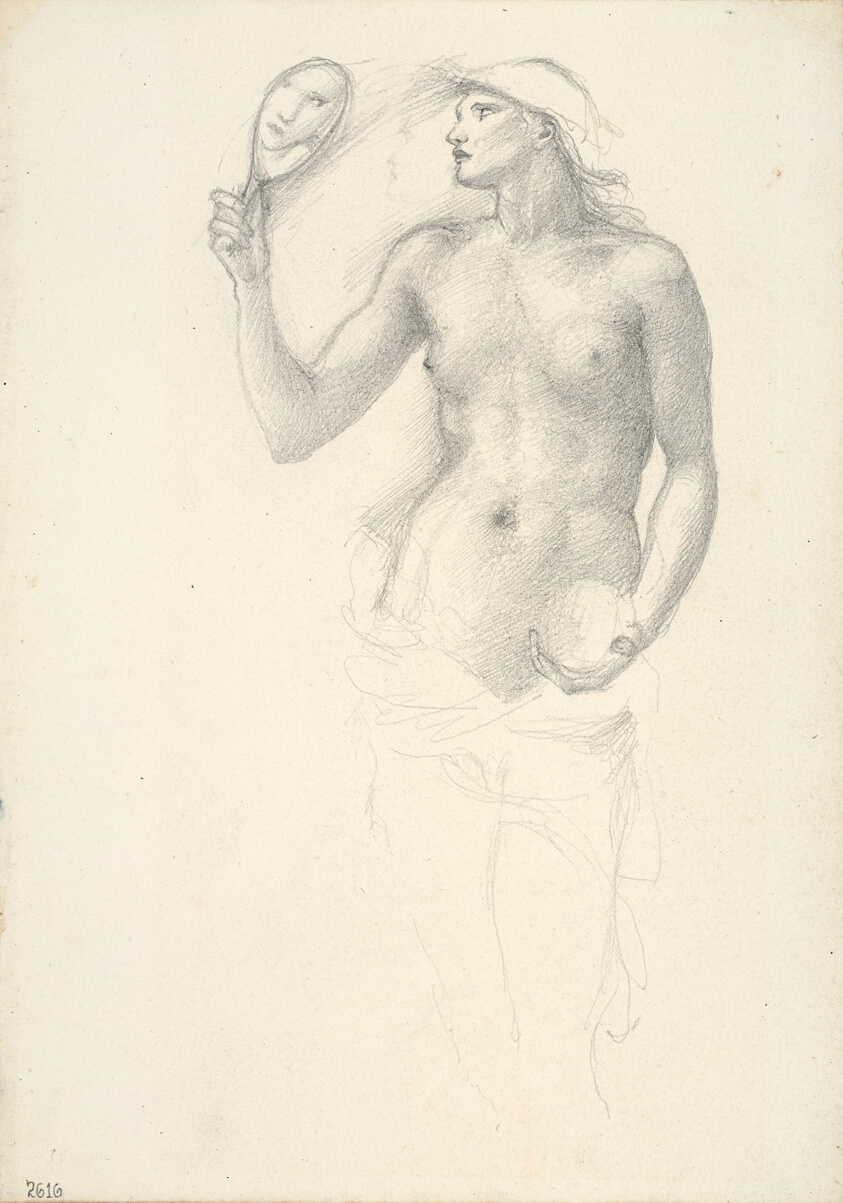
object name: Drawing and Watercolor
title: Semi-Nude Female Figure with Mirror in Right Hand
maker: Sir Edward Burne-Jones (English, 1833-1898)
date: c. 1873–77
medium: Graphite on ivory wove paper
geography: England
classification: graphite; drawings (visual works); prints and drawing